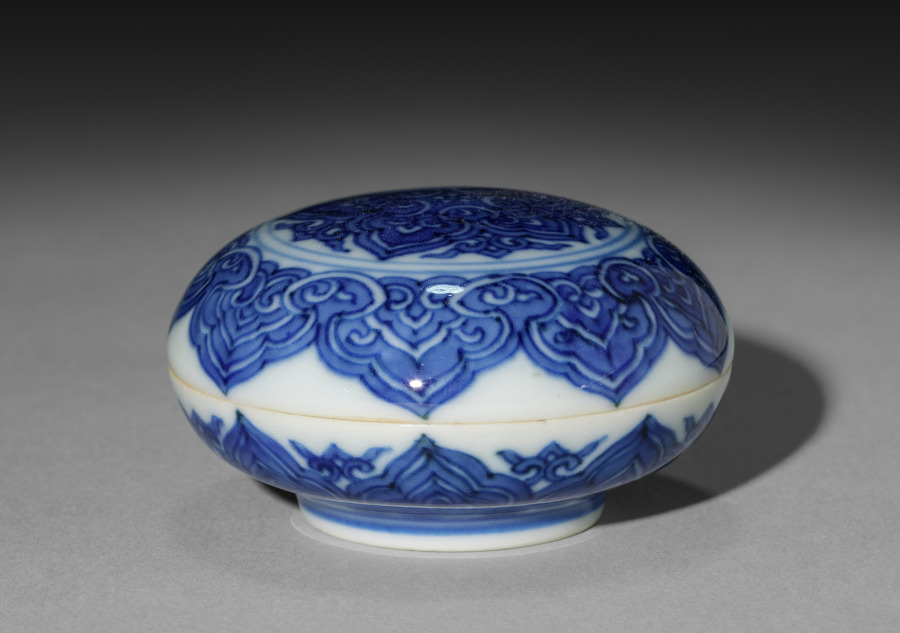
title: Round Covered Box with Medallions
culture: China, Jiangxi province, Jingdezhen kilns, Ming dynasty (1368-1644), Jiajing mark and reign (1522-66)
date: 1522–66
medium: porcelain with underglaze blue decoration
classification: Ceramic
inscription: 大明嘉靖年製